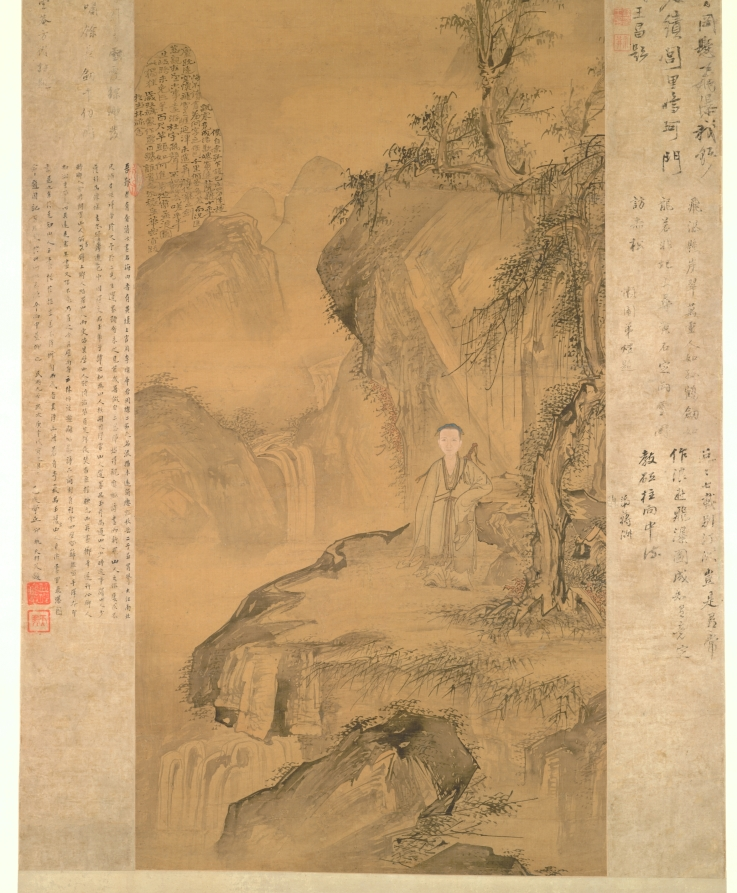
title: Layered Peaks and Splashing Waterfall: Portrait of Hua Yan as a Young Man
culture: China, Qing dynasty (1644-1911)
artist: Hua Yan (Chinese, 1682–c. 1765)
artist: and Wei Shijie (Chinese, 1667–after 1747)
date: 1705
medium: Hanging scroll; ink and color on silk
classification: Painting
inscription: 寫照余非擅，營圖爾自高。/ 偶然裁尺幅，毋待著三豪。/ 護嶺笙疑徹，豐誠劍且韜。/ 懸崖對飛雪，如聼廣陵濤。/ 士傑為秋岳道盟作小影並題。 [印]：魏士傑，子良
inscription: 僕自棄孤，乍設己隨四方。蓬根飄零，竟成浩嘆。 媿窮途於阮籍。十年悔不讀書。羞問字之侯芭。千里何曾負笈。而況匡廬既遠。空懐飛雪之崖。延津未遥，莫辯化龍之劍。 慈親在望，空事遠游。杜宇為聲，不如歸去。嗟乎，半生岐途，未免亡羊。百尺竿頭，如何進歩。 從前孟浪，圖此猖狂。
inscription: Top inscription on the painting by Jiang Hongdao 將弘道, dated yiyou, the forty-fourth year of the Kangxi era (1705)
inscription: Seven additional colophons on the silk mounting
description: This portrait was jointly executed by Wei Shijie and Hua Yan himself who painted the landscape in the background. Hua Yan is shown here at the age of about 23. The sword at his back is a reference to his early desire for a military career, while the scholar’s robe suggests an opposing aspiration. Together these are signs of a complex personality. The painting also reveals Hua Yan’s early talent in painting. While Wei Shijie is little known, Hua Yan would later become a well-known painter. In addition to Wei Shijie and Hua Yan, nine of Hua Yan’s contemporary friends left inscriptions on the painting.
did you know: Hua Yan's autobiographical inscription, full of remorse and insecurity, is squeezed into the contour of a hill in the upper left.